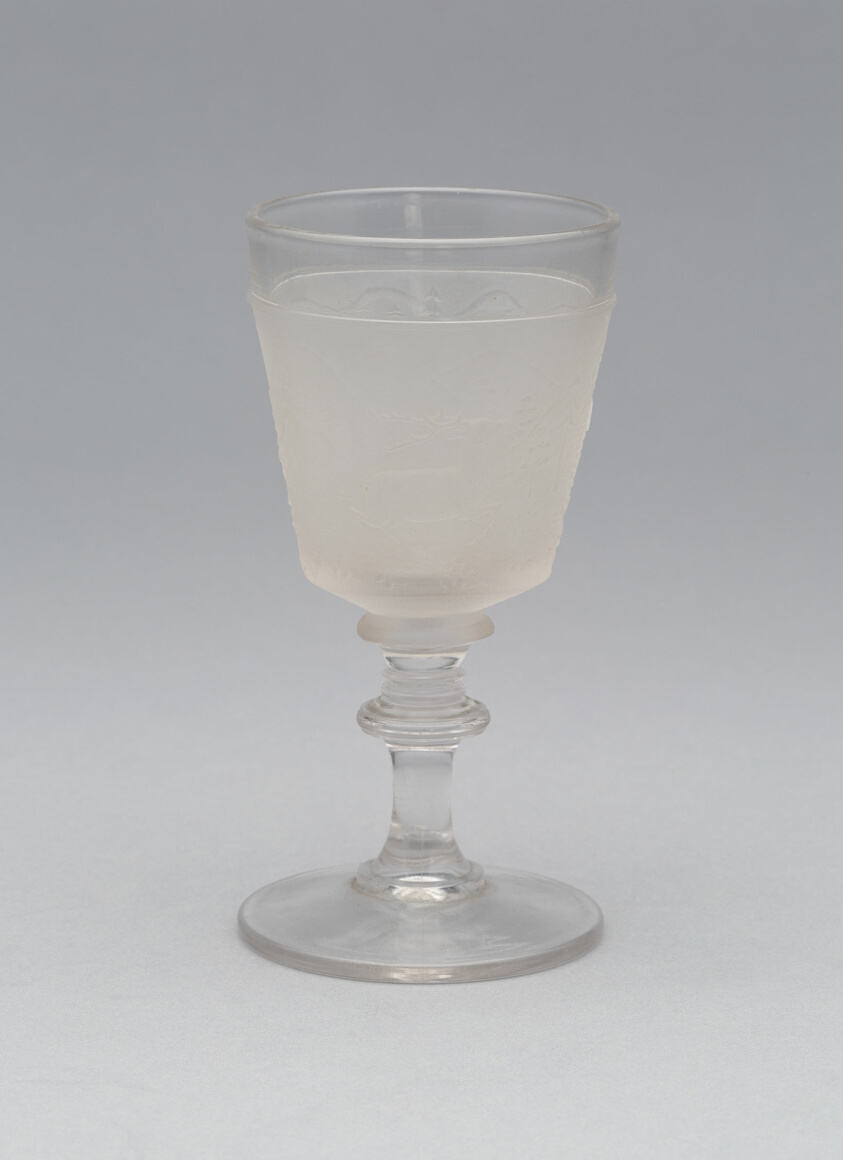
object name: Glass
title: "Westward Ho!/Pioneer" pattern cordial glass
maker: Gillinder and Sons, 1861–c. 1930; Philadelphia or Greenbsburg, Pennsylvania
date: c. 1876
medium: Glass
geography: Philadelphia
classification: drinking vessel; glass; american decorative arts; american arts; decorative arts